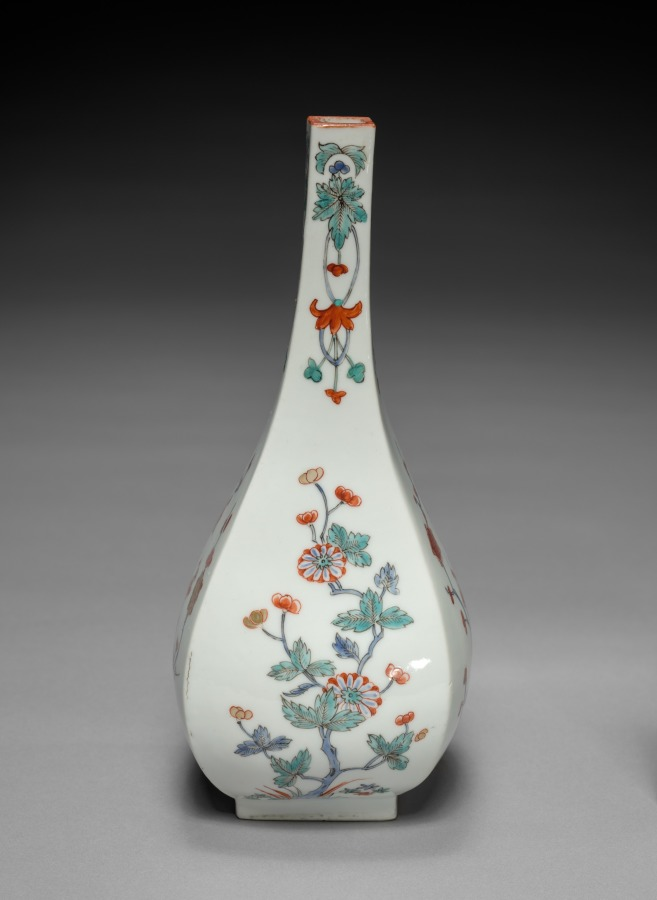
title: Bottle Vase with Plum and Chrysanthemum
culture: Japan, Edo period (1615–1868)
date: late 1600s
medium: porcelain with overglaze color enamel and gold (Hizen ware, Kakiemon type)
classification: Ceramic